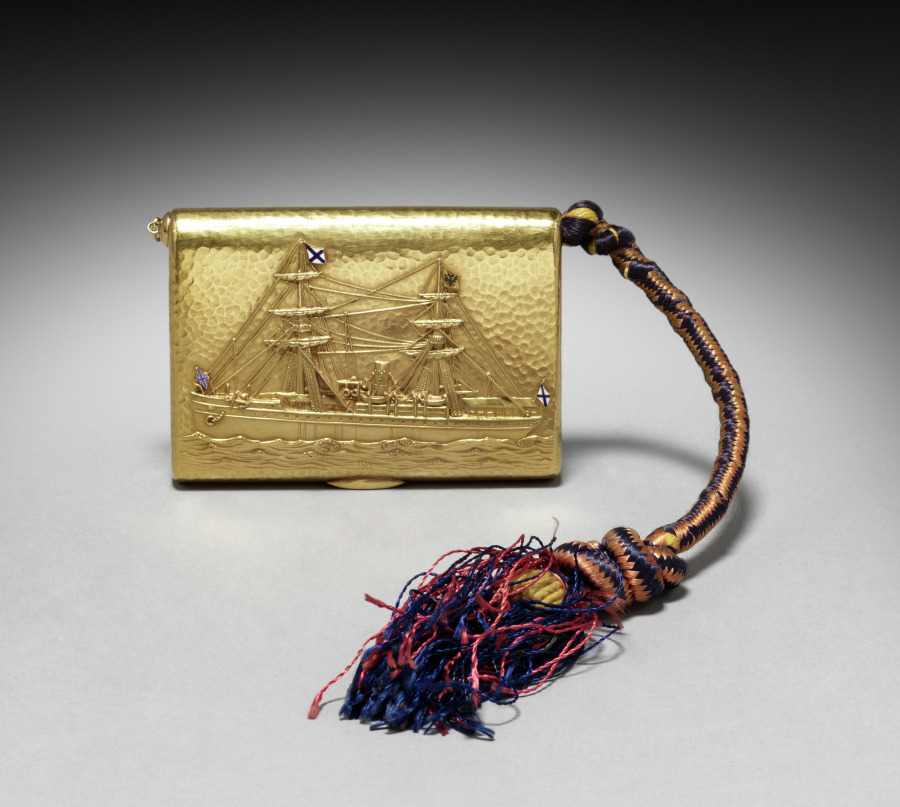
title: Cigarette Case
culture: Russia, St. Petersburg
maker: attributed to House of Fabergé (Russian, 1842–1918)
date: 1886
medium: gold, enamel, diamonds, silk cord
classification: Miscellaneous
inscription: inscribed: In Rembrance/from Sandro/Sevastopol/1886/6 May in Cyrillic script.